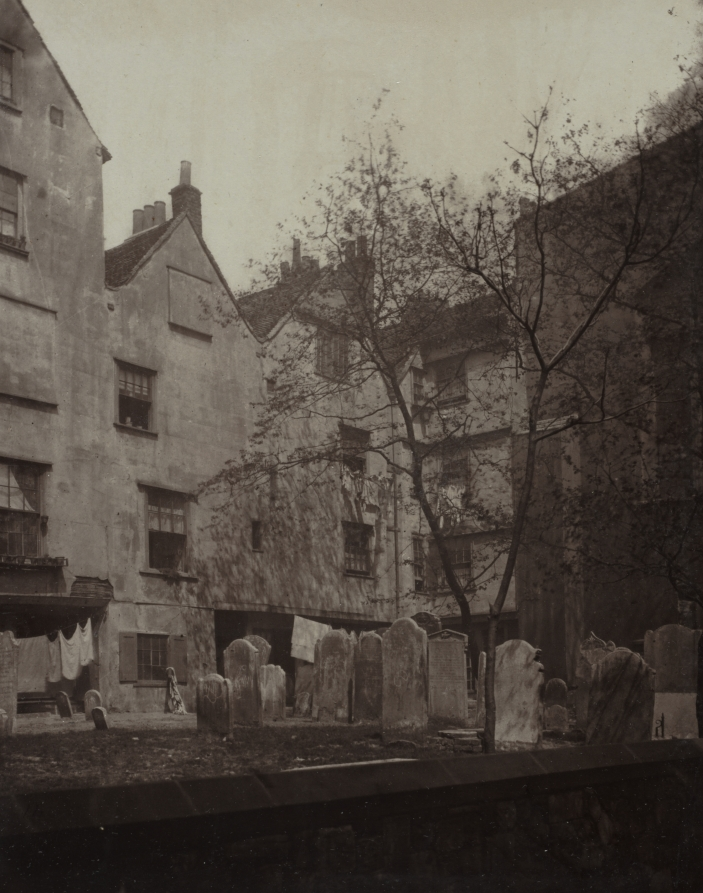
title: St. Bartholomews: The Churchyard Looking towards Cloth Fair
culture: England, 19th century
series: Old London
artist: Alfred H. Bool (British)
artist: and John Bool (British)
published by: The Society for Photographing the Relics of Old London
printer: Henry Dixon (British, 1820–1893)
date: 1877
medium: carbon print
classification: Photograph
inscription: Written in ink on verso: "112, Albany St. N.W."